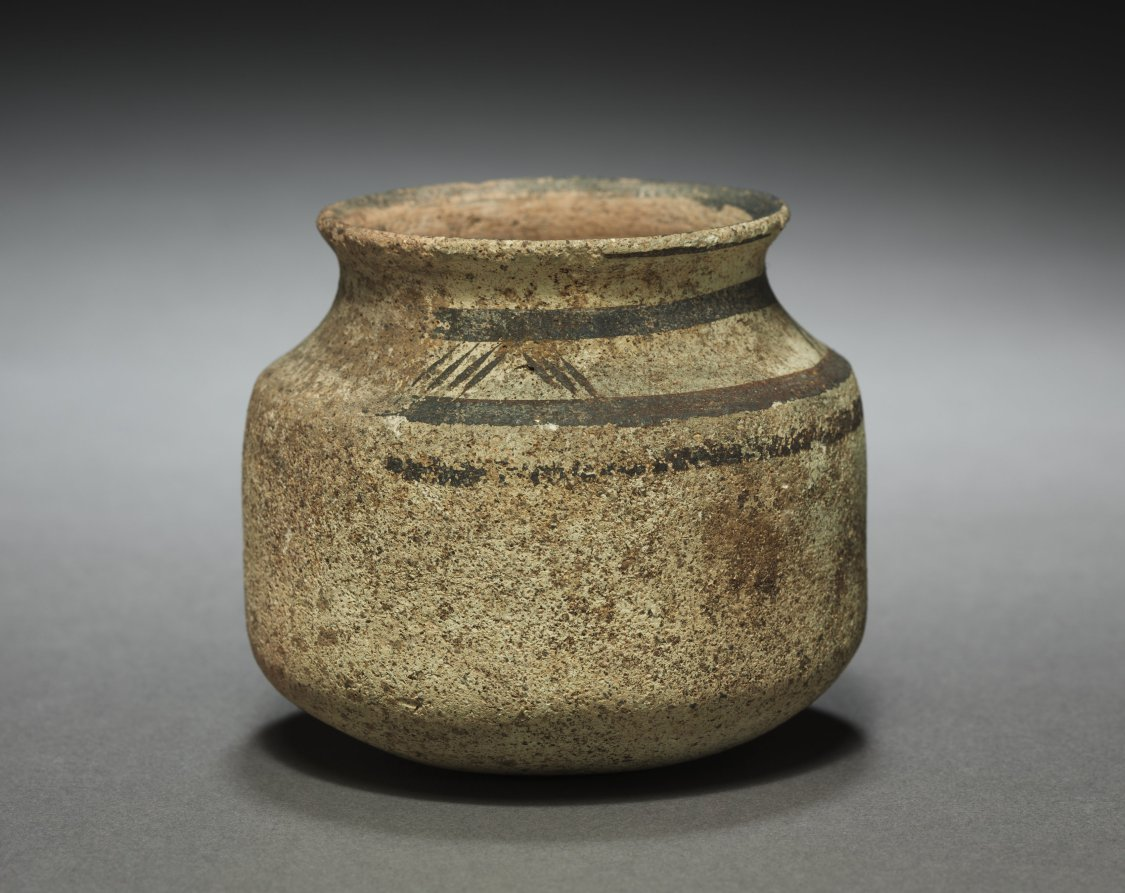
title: Pot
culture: Iran, Luristan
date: 3000–2000 BCE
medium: earthenware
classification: Ceramic